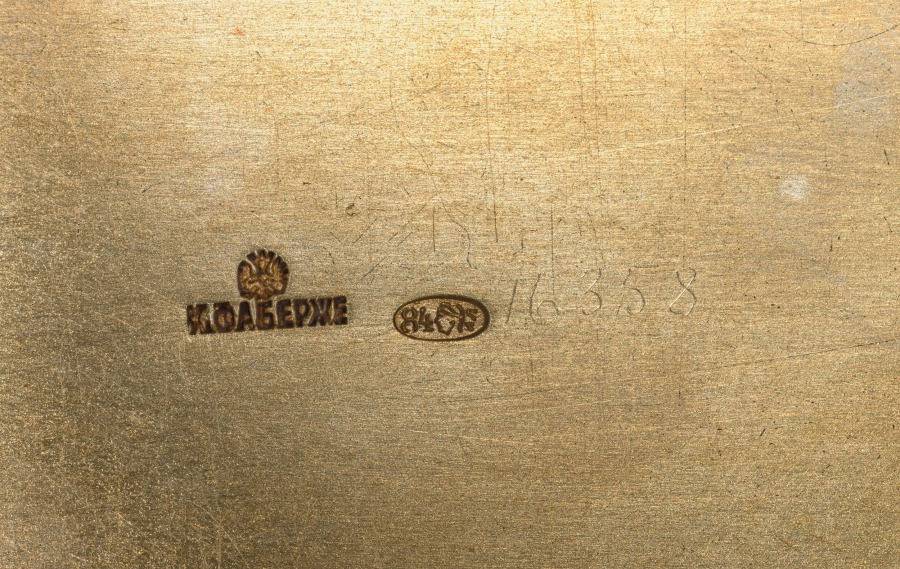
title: Cigar Box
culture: Russia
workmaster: attributed to Feodor Ivanovich Rückert (Russian, 1840–1917)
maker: House of Fabergé (Russian, 1842–1918)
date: c. 1896–1908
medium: Silver gilt, enamel, sapphire set in gold; [reproduction silk tinder cord, gold and moonstone catch]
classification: Silver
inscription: C. Fabergé (in Cyrillic); double-headed eagle [imperial warrant]; 84, Kokoshnik, tester's initials [assay mark for Moscow, 1896-1908]; scratched 16358.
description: Fabergé’s craftsmen in Moscow became known for their work in the pan-Slavic or neo-Russian taste, hearkening back to 17th-century styles of Russian folk decoration. In this whimsically oversized box for cigars or loose tobacco, Fabergé used the technique to highlight a symbol of imperial royalty, the preening peacock, here rendered in brilliant hues of blue and green enamels.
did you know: Peacocks were considered a symbol of imperial royalty in Russia.